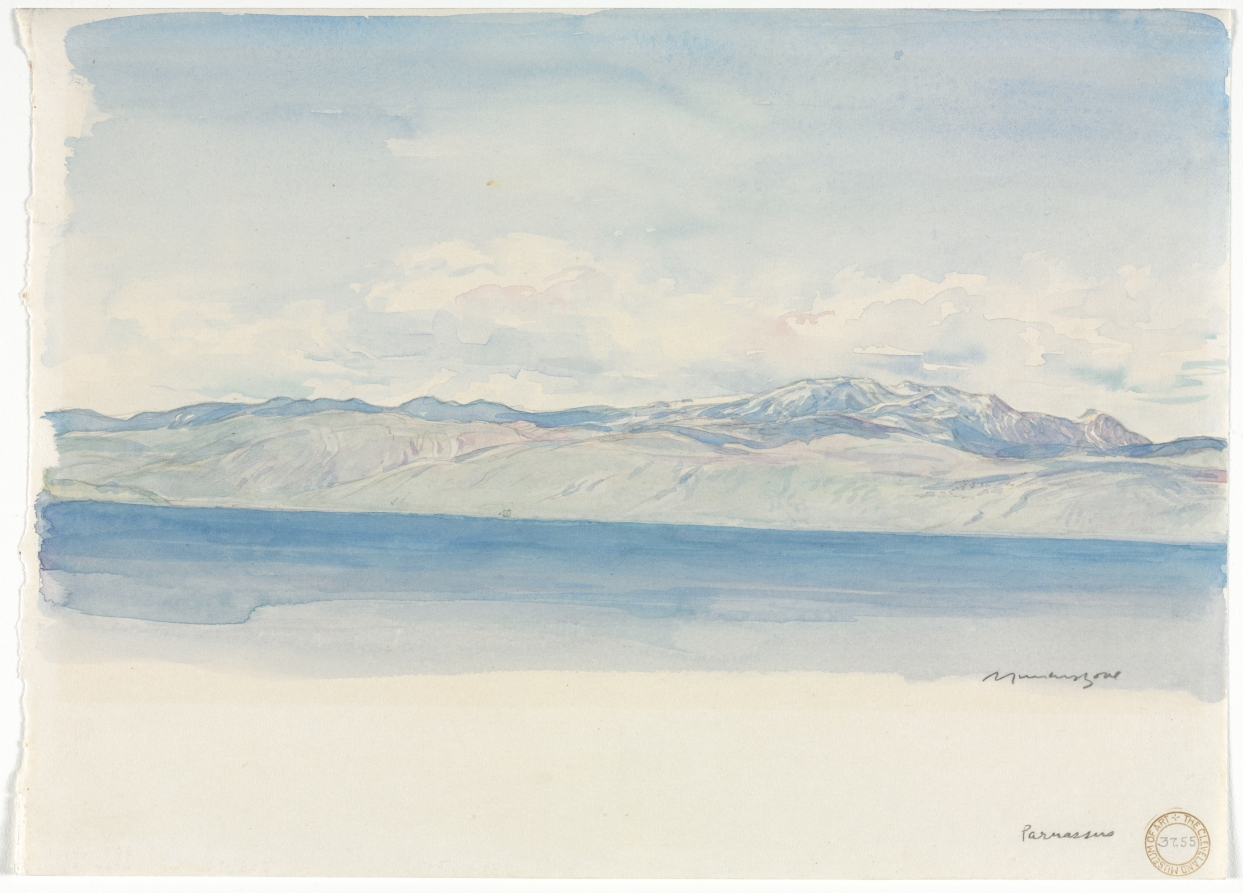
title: Parnassus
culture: England, 20th century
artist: Muirhead Bone (British, 1876–1953)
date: c. 1896–1937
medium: watercolor over graphite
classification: Drawing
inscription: In graphite, lower right: "Muirhead Bone"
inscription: Extreme lower right: "Parnassus"